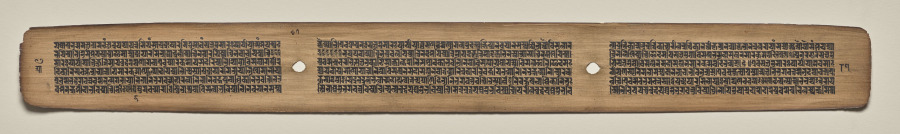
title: Text, Folio 87 (verso), from a Manuscript of the Perfection of Wisdom in Eight Thousand Lines (Ashtasahasrika Prajnaparamita-sutra)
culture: Eastern India, Bihar, Vikramashila Monastery. Painting: Nepal, Kathmandu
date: Sunday, September 14, 1119 (year 239 of the Newar Samvat in the month of Ashvina)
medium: gum tempera and ink on palm leaves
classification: Painting